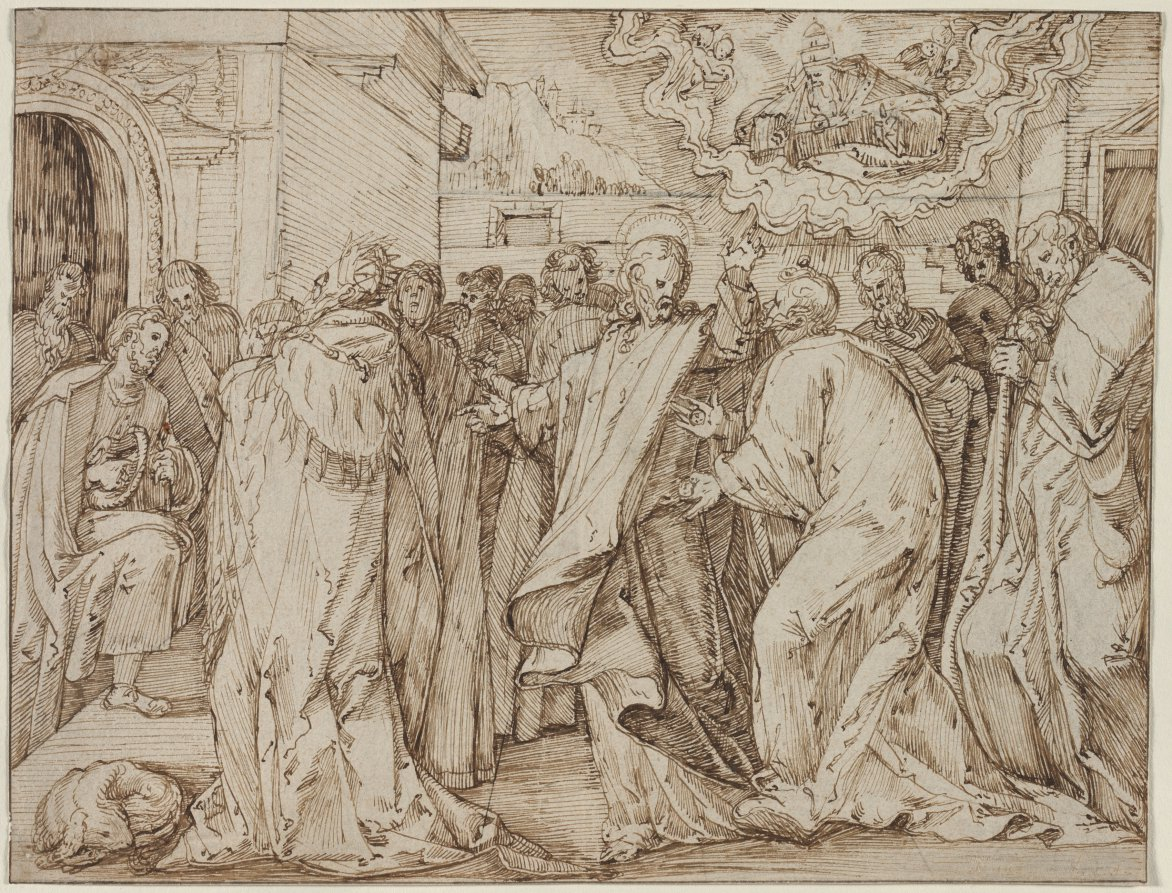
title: The Parable of the Tribute Money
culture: Netherlands, late 16th Century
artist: Master of the Egmont Albums (Netherlandish, 1480-1620)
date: c. 1580–1600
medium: Pen and brown ink, traces of pen and black ink and black chalk, on paper; framing lines in brown ink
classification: Drawing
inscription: falsely signed, lower right, in brown ink: Hans van Aken fecit. [abraded, visible under UV] ; VERSO, right center, in graphite: 259 ; lower left, in graphite: 641 M. 244 / (1V7) ; lower left, in graphite: PMG ; lower right, in graphite: 2063 [circled] ; lower right, in graphite: [illegible] [partially erased] ; lower right, in graphite: [illegible] [partially erased] ; lower right, in graphite: 239. ; lower right, in graphite: 53 [crossed out]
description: The New Testament parable of the tribute money addresses the division between worldly and divine power. Here, the artist depicted Christ in the center of a civic square with one hand pointing toward a king wearing a crown and an ermine robe and the other toward God above. Encouraged by Christ’s words to show each authority its due, the crowd shows deference to both the king and God via facial expression, pose, and gesture. Parables were enduringly popular on prints, stained glass, and decorative objects for their relevance to the issues and choices made by everyday citizens.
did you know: The pose of the kneeling man and the decoration of the door surround in this drawing are both based on details in a woodcut made earlier in the century by the German artist Albrecht Dürer.